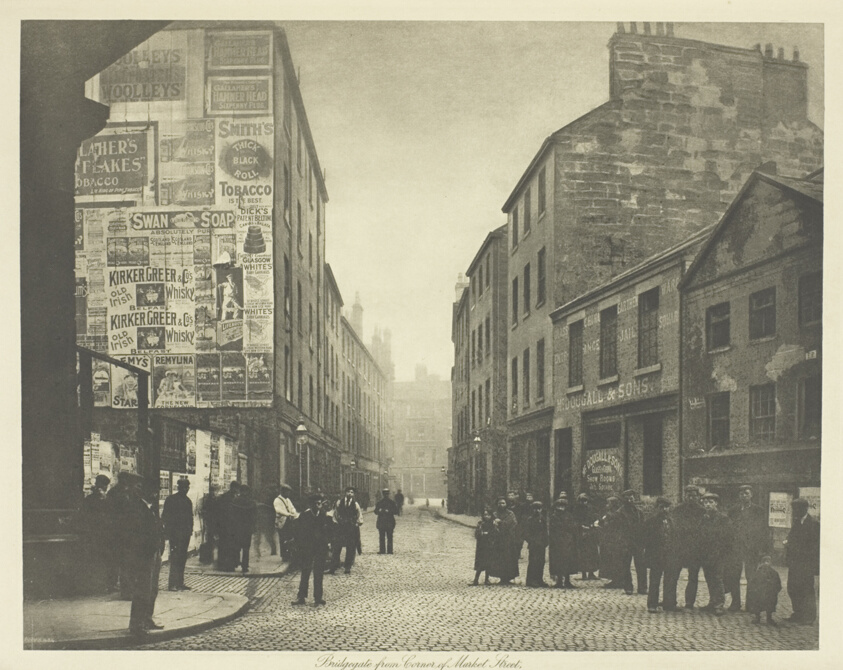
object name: Photograph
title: Bridgegate from Corner of Market Street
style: 19th century, Pictorialism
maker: James Craig Annan (Scottish, 1864-1946)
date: 1899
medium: Photogravure, plate 49 from the book "The Old Closes & Streets of Glasgow" (1900)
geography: Scotland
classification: photograph; photography